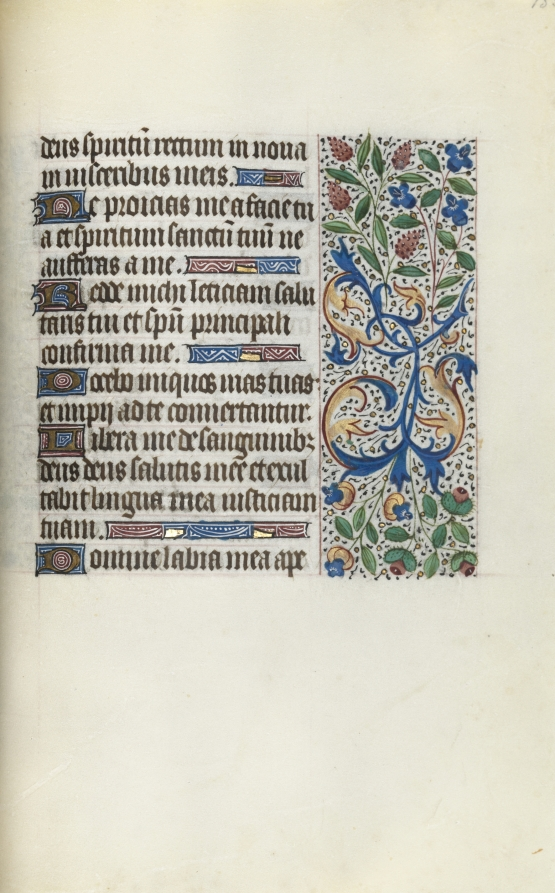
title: Book of Hours (Use of Rouen): fol. 135r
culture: France, Rouen, 15th century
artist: Master of the Geneva Latini (French, active Rouen, 1460–80)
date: c. 1470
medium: ink, tempera, and gold on vellum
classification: Bound Volume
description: In the late 1400s and early 1500s Rouen was an established and important center of book production. The city’s cathedral had a wealthy chapter that spent large sums of money to commission books and to maintain its extensive library. The stationers and booksellers would have likely been concentrated in or near the cathedral precinct. This artist, named after a manuscript now in Geneva, was Rouen’s principal illuminator during the second half of the 1400s.